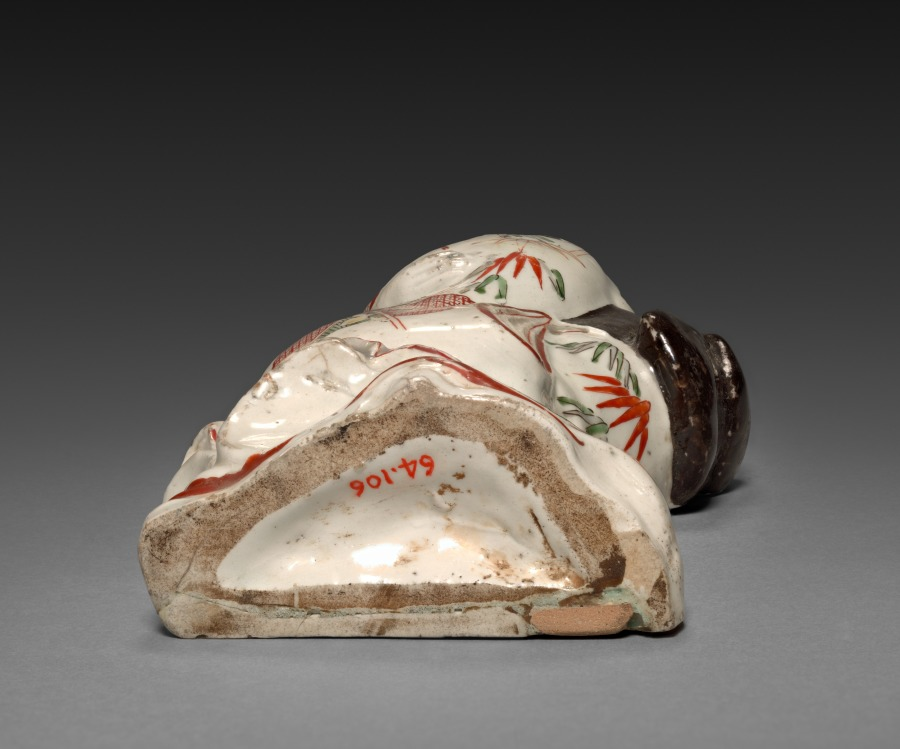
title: Standing Figure of a Beauty: Arita Ware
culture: Japan, Edo period (1615–1868)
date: 1600s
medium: porcelain with overglaze enamel decoration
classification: Ceramic